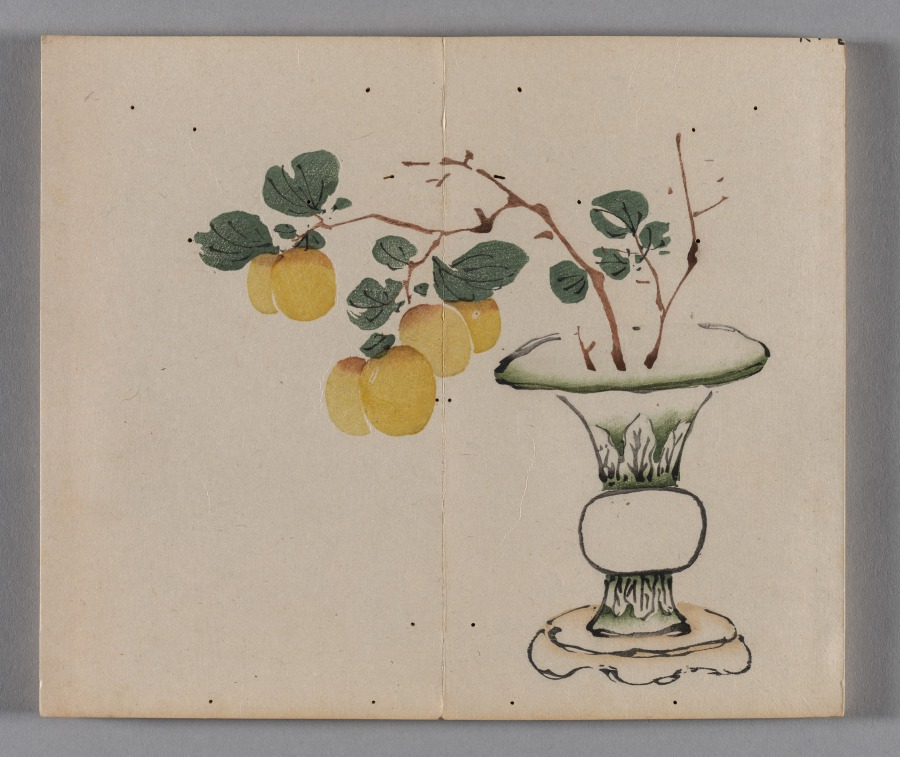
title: Ten Bamboo Studio Painting and Calligraphy Handbook (Shizhuzhai shuhua pu): Fruit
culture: China, Qing dynasty (1644-1911)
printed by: Hu Zhengyan (Chinese, c. 1584–1674)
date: 1633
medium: Woodblock-printed book; ink and colors on paper; first edition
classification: Print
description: Color printing reached a level of perfection in the early 1600s, as seen in this Ten Bamboo Studio Collection of Calligraphy and Painting and the Mustard Seed Garden Manual of Painting (printed 1679 and 1701). The painterly quality, precision in registering (aligning) the woodblocks, and harmonious colors made them the most successful color print editions in Chinese history. Both editions were printed and compiled in Nanjing, spread nationwide, and had a great impact on the arts in Japan and Korea.